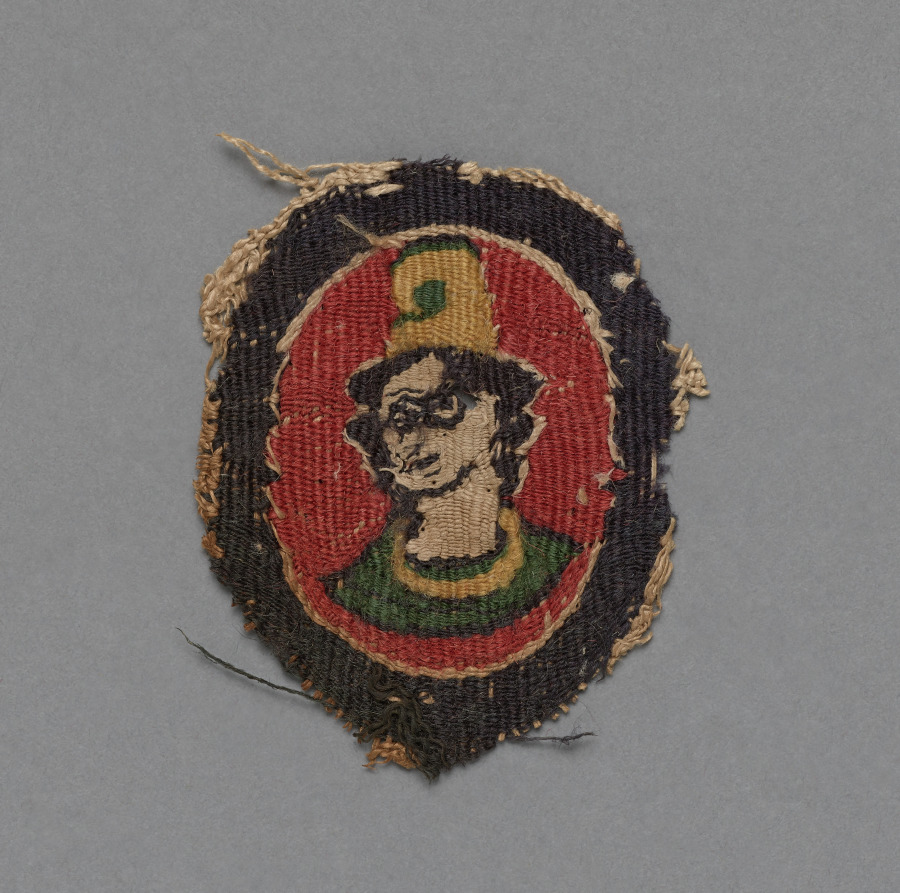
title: Fragment from a Tunic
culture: Egypt, 6th - 16th century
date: 500s - 1500s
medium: tabby weave with inwoven tapestry ornament, linen and wool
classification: Textile